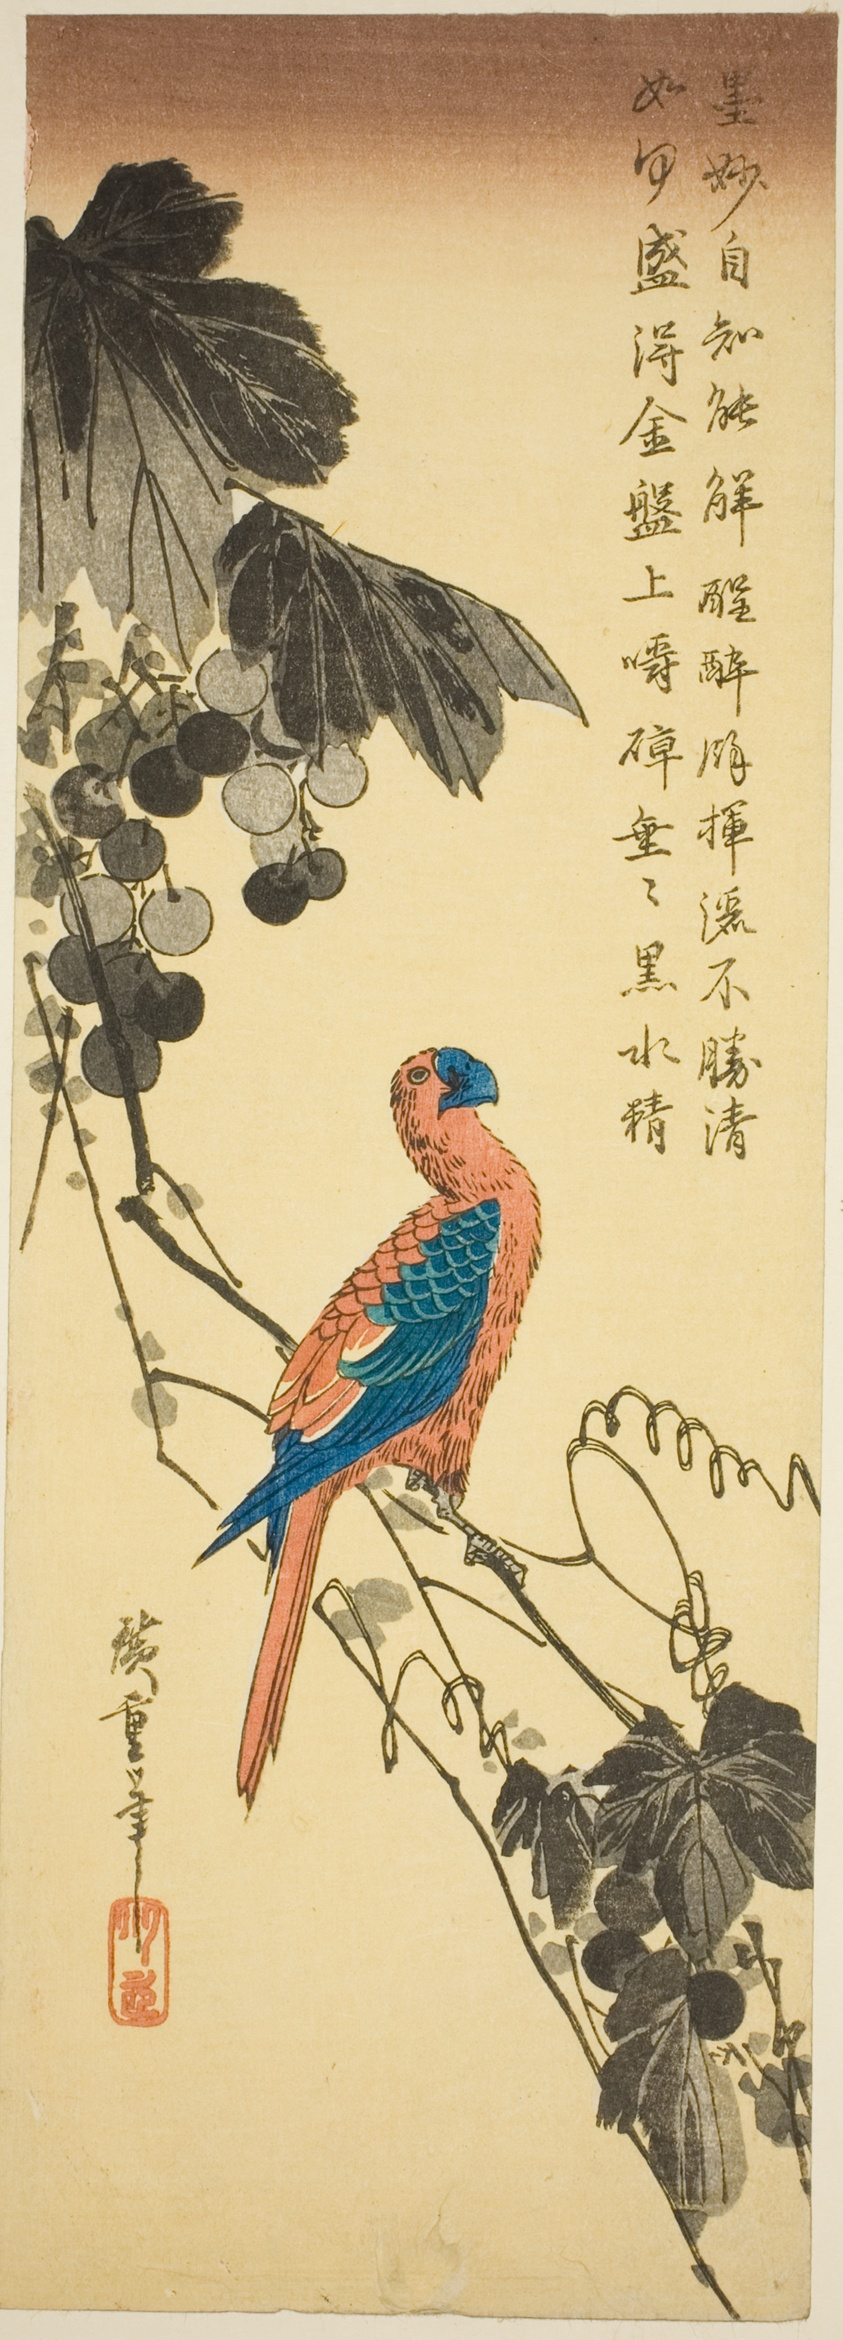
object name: Print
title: Parrot on a Grapevine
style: Japanese (culture or style)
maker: Utagawa Hiroshige 歌川 広重; Japanese, 1797-1858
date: mid–1830s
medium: Color woodblock print; chu-tanzaku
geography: Japan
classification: woodblock print; print; asian art